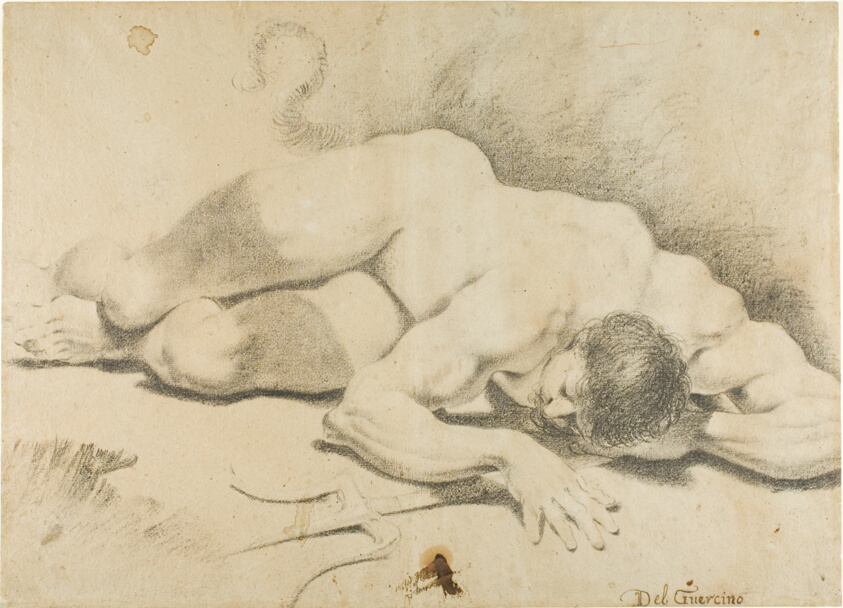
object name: Drawing and Watercolor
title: Reclining Male Nude, with Trident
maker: Pietro Faccini (Italian, c. 1560-1602)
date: 1593/1602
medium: Oiled charcoal on gray-brown laid paper, laid down on cream wove paper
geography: Italy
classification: charcoal; drawings (visual works); prints and drawing